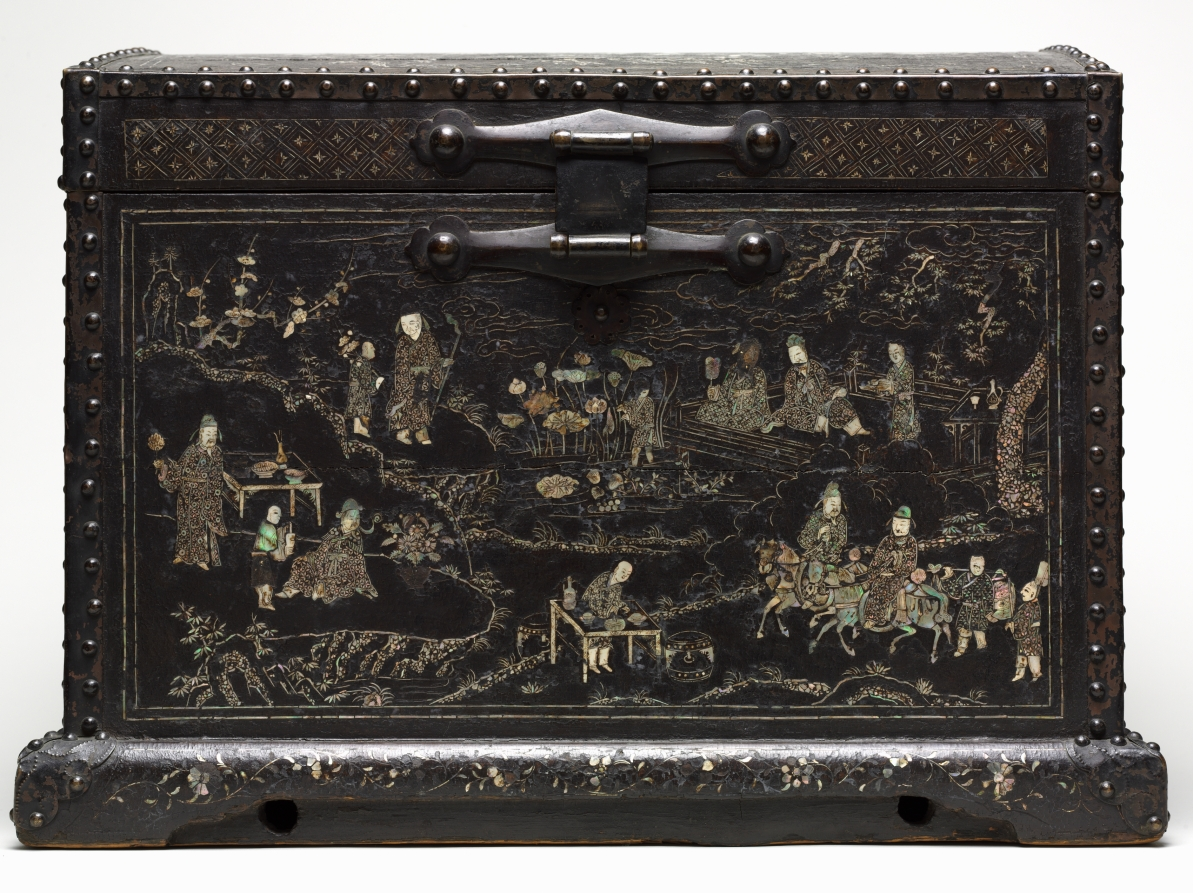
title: Chest for Storing Garments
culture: China, Ming dynasty (1368–1644)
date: 1400s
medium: lacquered wood with mother-of-pearl inlay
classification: Lacquer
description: This precious lacquer box is decorated with bird and plant motifs and figures in mother-of-pearl inlay. The decoration depicts the leisurely pursuit of scholars in nature and a garden setting. Scholars play the board game weiqi, have philosophical conversations, pluck a qin (a zither-like instrument with strings), and read books. Lacquer chests of this type were used to store garments neatly folded along their straight seams. The mother-of-pearl inlay from shells is a technique that was typically practiced by craftsmen in Hangzhou and other parts of southeast China near the sea.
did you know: Lacquer chests of this type were used to store garments.